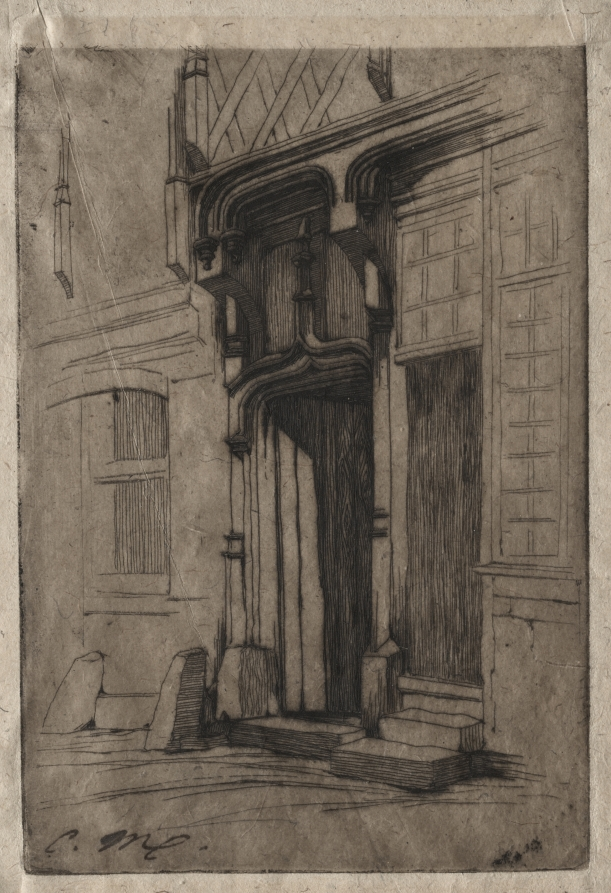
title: Doorway of an Ancient Convent in the Rue Mirabeau, Bourges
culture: France, 19th century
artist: Charles Meryon (French, 1821–1868)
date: 1851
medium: etching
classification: Print